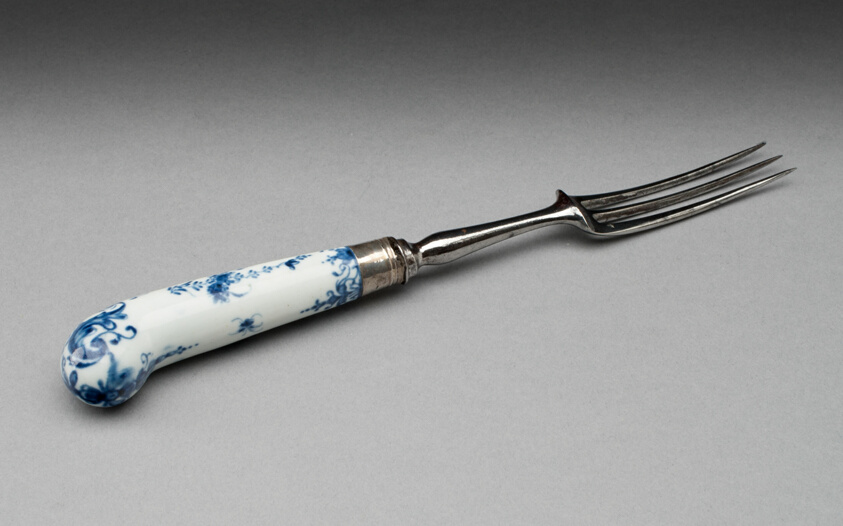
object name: Ceramics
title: Fork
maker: Worcester Porcelain Factory (Warmstry House Period, 1751–1783); Worcester, England, founded 1751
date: c. 1760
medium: Soft-paste porcelain with underglaze blue decoration, silver and steel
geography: Worcester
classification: tableware; ceramics; porcelain; european decorative arts